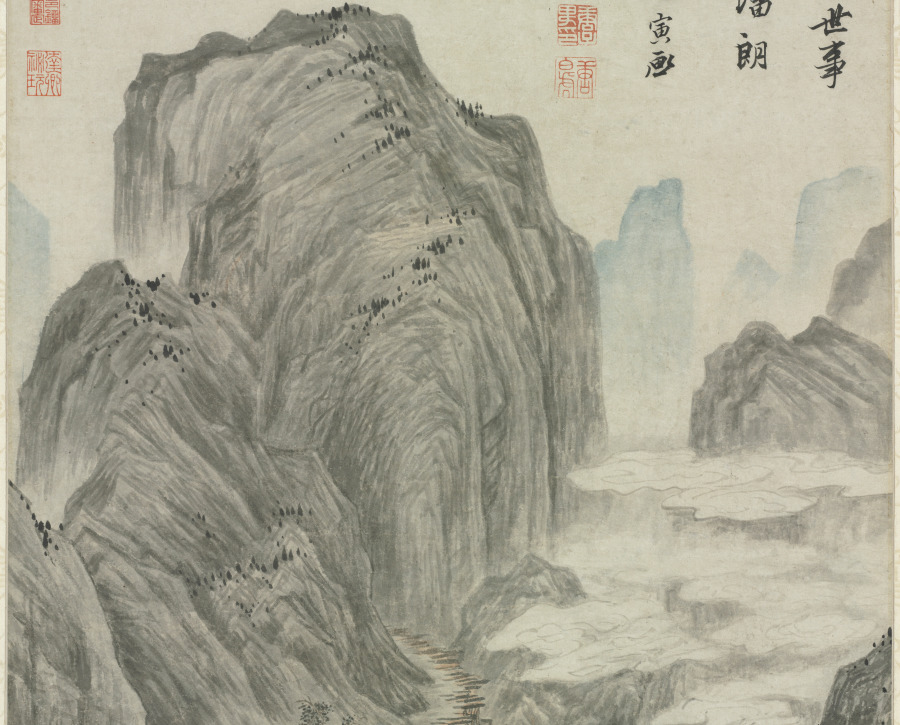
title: Mount Hua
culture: China, Ming dynasty (1368–1644)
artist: Tang Yin (Chinese, 1470–1523)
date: 1506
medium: hanging scroll; ink and light color on paper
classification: Painting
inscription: Artist's inscription, signature, and 4 seals: Wearing a white-bordered scholar's robe and green jade pendants, His life is unconcerned with worldly fame. Like P'an Lang resisting old age through high spirits, Crazy and clumsy he rides his donkey past Mount Hua. T'ang Yin painted this and composed the poem, the first month of the year of the Cheng-te era [1506]. [2 seals] T'ang Tzu-wei yin; T'ang. [2 seals, lower left corner] Po-hu T'ang Yin ssu yin; T'ang Chü-shih. trans. LYSL 12 additional seals: 2 of Wang Shan (1645-1728); 5 of Liu Shu (1759-1816); 1 of Yeh Ao (19th c.); 1 label and 2 seals of Lu Hui (1851-1920); 2 seals unidentified.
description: In this work, Tang Yin accumulates towering mountain summits in the manner of the Sung master, Li Tang, to capture the monumental presence of his subject. Tang Yin’s angular brushstrokes and ink washes of varied intensity give texture to the rocky surface and accent the play of light. Mount Hua is situated in southern Shaanxi province in North China. Hardly accessible during Tang Yin’s time, the mountains were frequented by immortality seekers to dwell or collect herbal drugs there. Tang Yin's potentially brilliant career was shattered in 1499 after he went to the capital to take the jinshi examination. He got entangled in a bribery case that caused him to spend seven years in prison. After his release, Tang returned to Suzhou, and settled on a career as a professional painter. One of Tang's few dated works, Mount Hua was painted seven years after this incident.